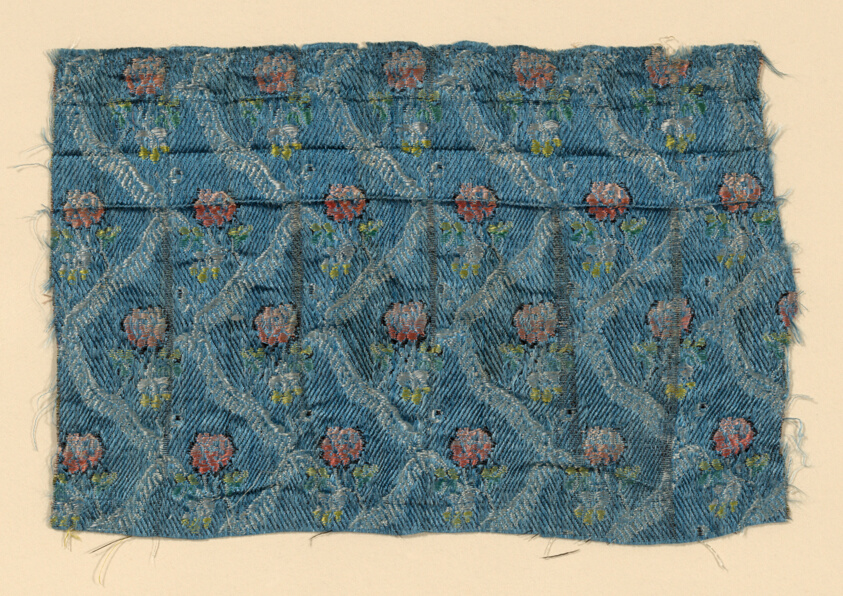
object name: Textile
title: Fragment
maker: France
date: 1750/1800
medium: Silk, plain compound cloth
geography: France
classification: textile; weaving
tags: zigzags, flowers